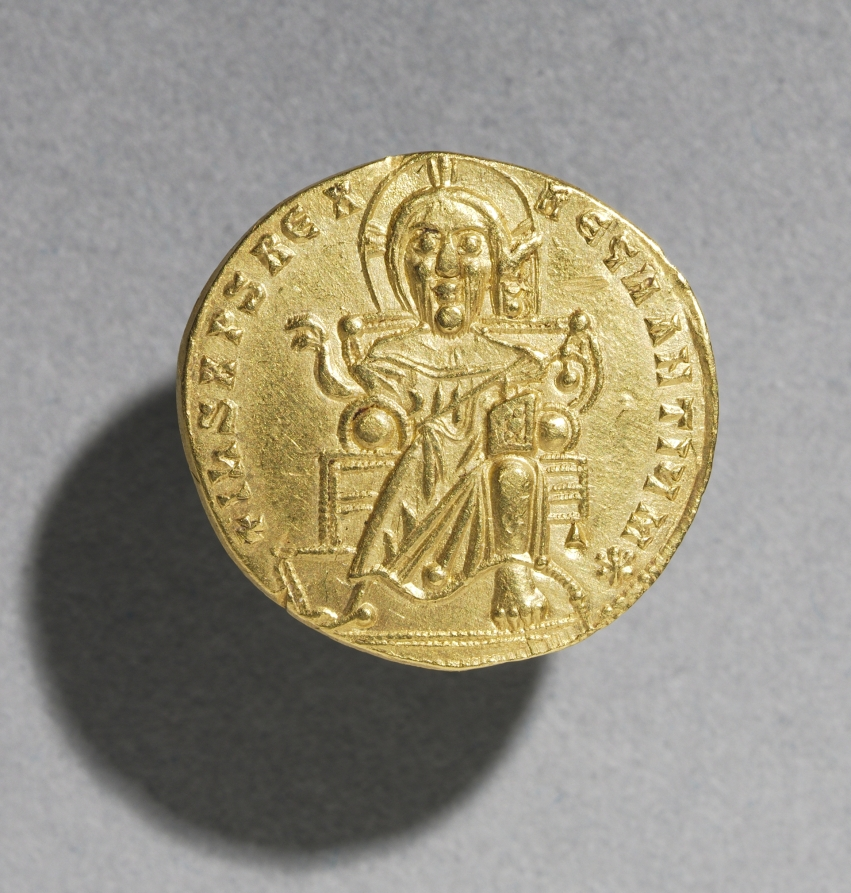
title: Solidus with Romanus I Lecapenus and His Son Christopher (obverse)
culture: Byzantium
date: 920–944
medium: gold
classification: Coins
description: Byzantine Gold Coins The vast number of surviving Byzantine coins attests to the level of trade across the empire. Controlled and supervised by the emperor, the producers of coins took care to represent his authority and reflect his stature. Talented artists were recruited to engrave the dies (molds) used for the striking of coins. Emperors increasingly came to include their heirs and co-emperors on their coinage, as well as other family members or even earlier rulers. Coins were recognized, then as now, as small, portable works of art. With their inscriptions and images, Byzantine coins provide valuable documentation of historical events and a record of the physical appearance of the emperors. The coins shown here include the solidus, the basic gold coin of 24 karats; the tremissis, a gold coin of one-third the weight and value of the solidus; and the nomisma, which in the 10th century replaced the solidus as the standard gold coin.